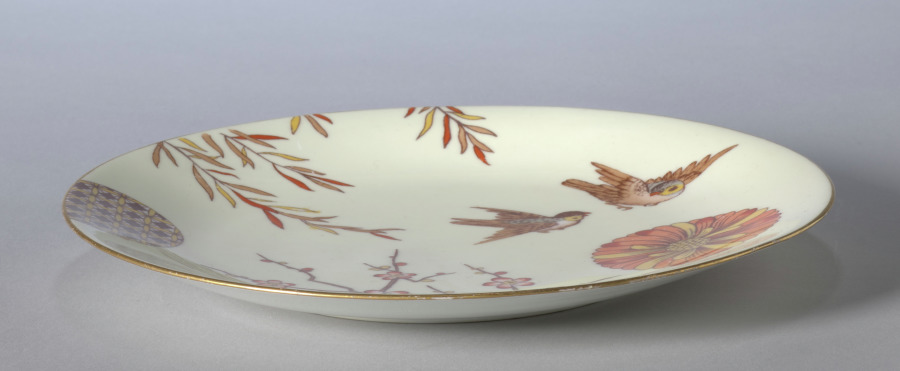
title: Plate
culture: England, 19th century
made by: Minton Pottery and Porcelain Factory (British)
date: 1880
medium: porcelain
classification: Ceramic